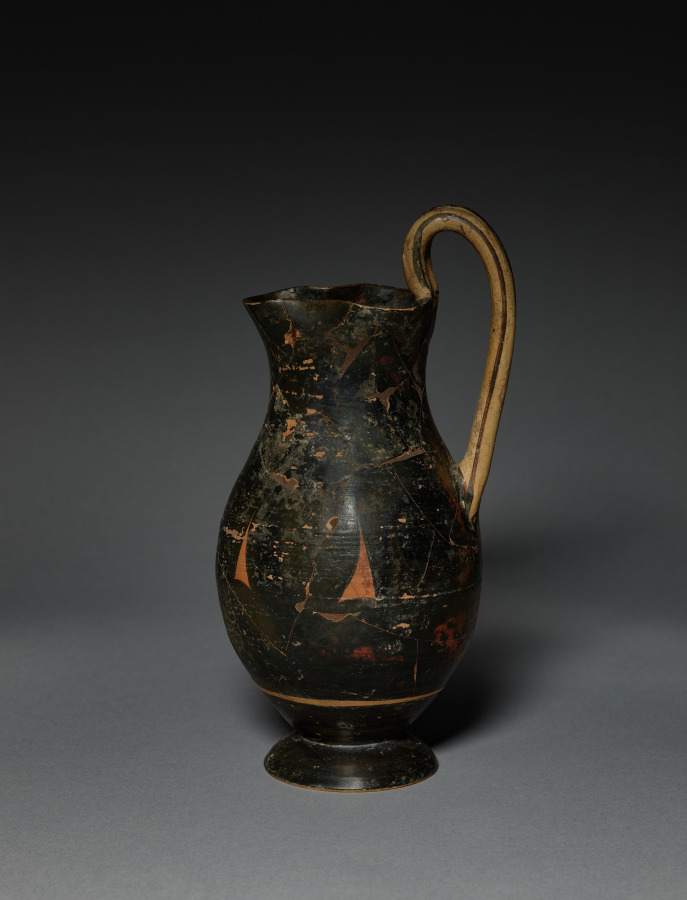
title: Black-Figure Olpe (Wine Jug): Rooster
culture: Greek, Middle/Late Corinthian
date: c. 575 BCE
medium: ceramic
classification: Ceramic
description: Although this wine jug, simply decorated with a rooster and two lotus blossoms, looks much like Athenian vases, it was made in Corinth. The paler buff color of the Corinthian clay can be seen on the handle and in some areas of loss, but the background of the decorated area has been covered with a red slip imitating the reddish, iron-rich Attic (or Athenian) clay. On the back of the vase, two reserved (red) crescent shapes may represent eyes, like those painted in much more detail on many drinking cups of this period.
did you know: Roosters appear frequently on vases—alone, in cock fights, and as love gifts.